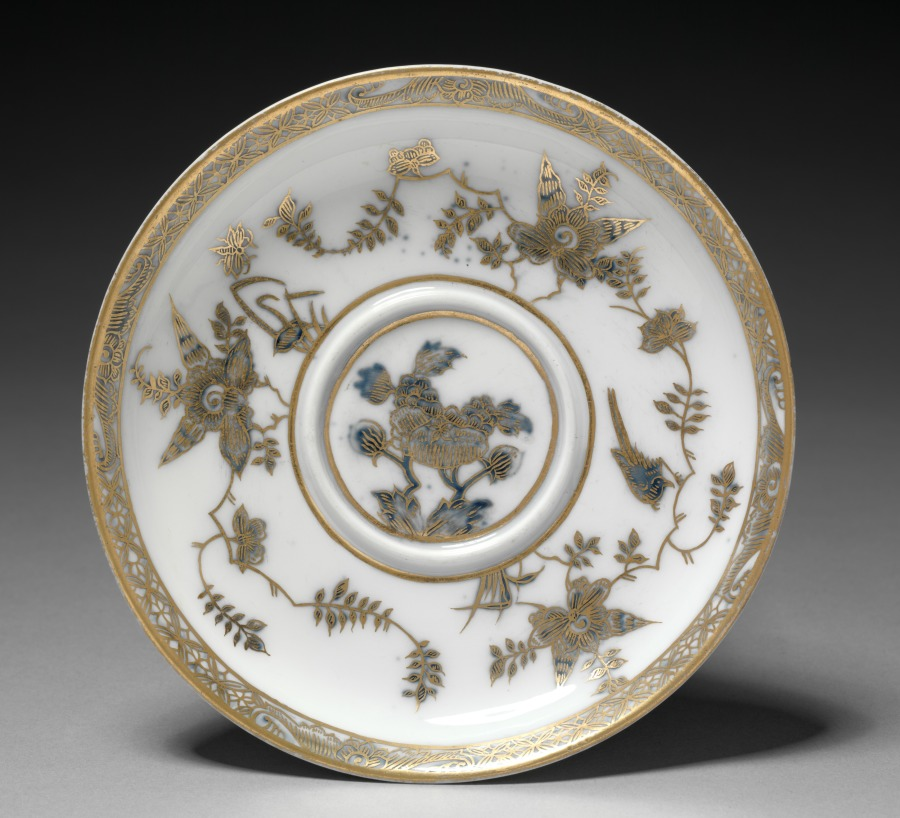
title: Stand for a Covered Broth Bowl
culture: Germany, Meissen, 18th century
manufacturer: Meissen Porcelain Factory (German, est. c. 1710)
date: 1730–40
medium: gilt porcelain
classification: Ceramic